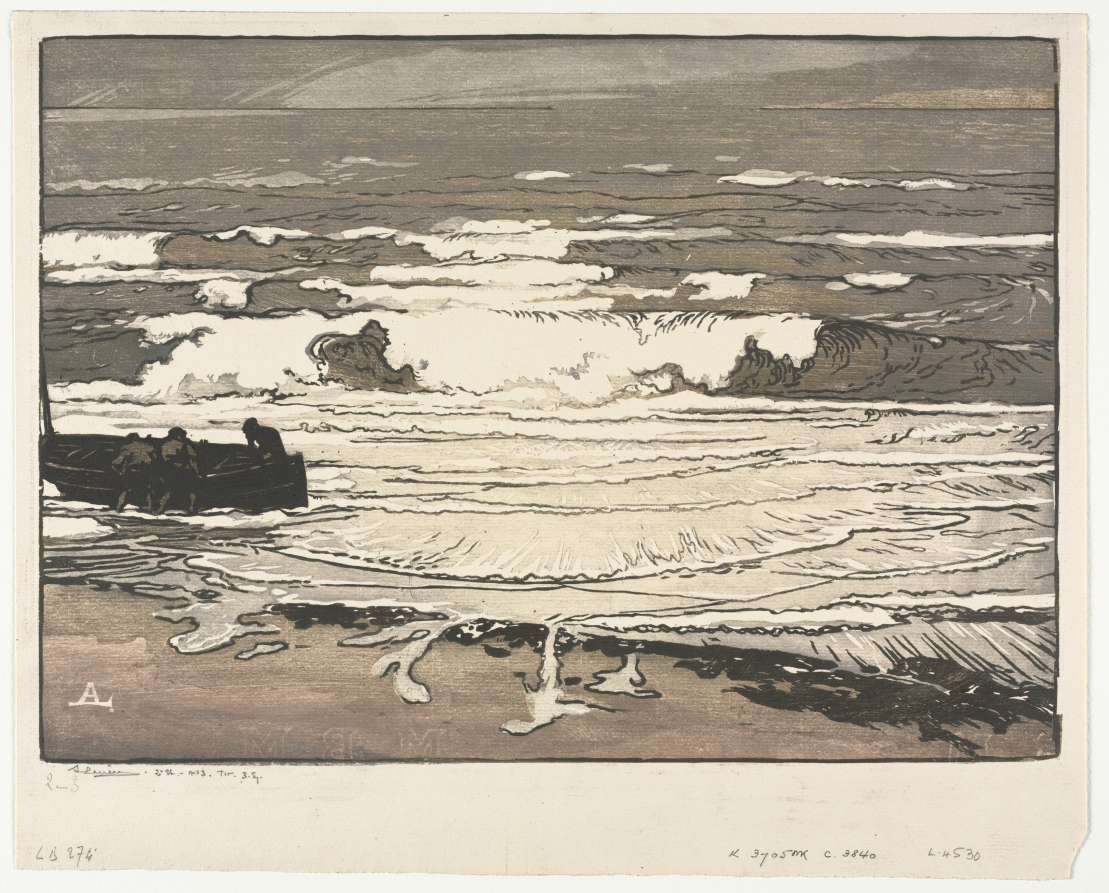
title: The Breaking Waves, Tide of September 1901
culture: France, early 20th Century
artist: Auguste Louis Lepère (French, 1849–1918)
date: 1901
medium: color woodcut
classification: Print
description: In the 1880s, Lepère was an early exponent of the woodcut as a fine art medium, experimenting with the technique and exhibiting his prints. His example probably encouraged Henri Rivière to produce woodcuts in the Japanese manner (see Wave in the Rain). In fact, Lepère and Rivière created the first French color woodcuts conceived and printed entirely in imitation of Japanese woodcut techniques. By 1890, woodcut would be taken up by the sculptor Aristide Maillol and such painters as Félix Vallotton and Paul Gauguin, and by 1895, a full-scale revival was underway.